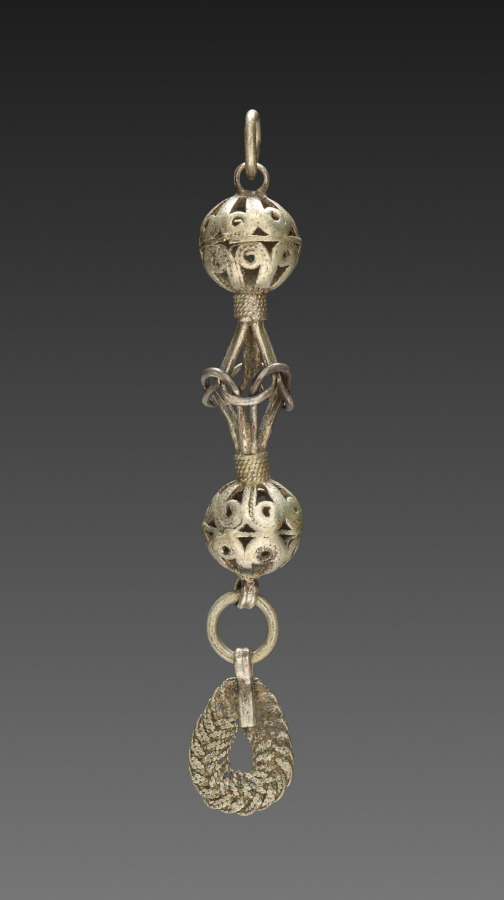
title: Button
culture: Balkans, 19th century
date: 1800s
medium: silver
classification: Jewelry